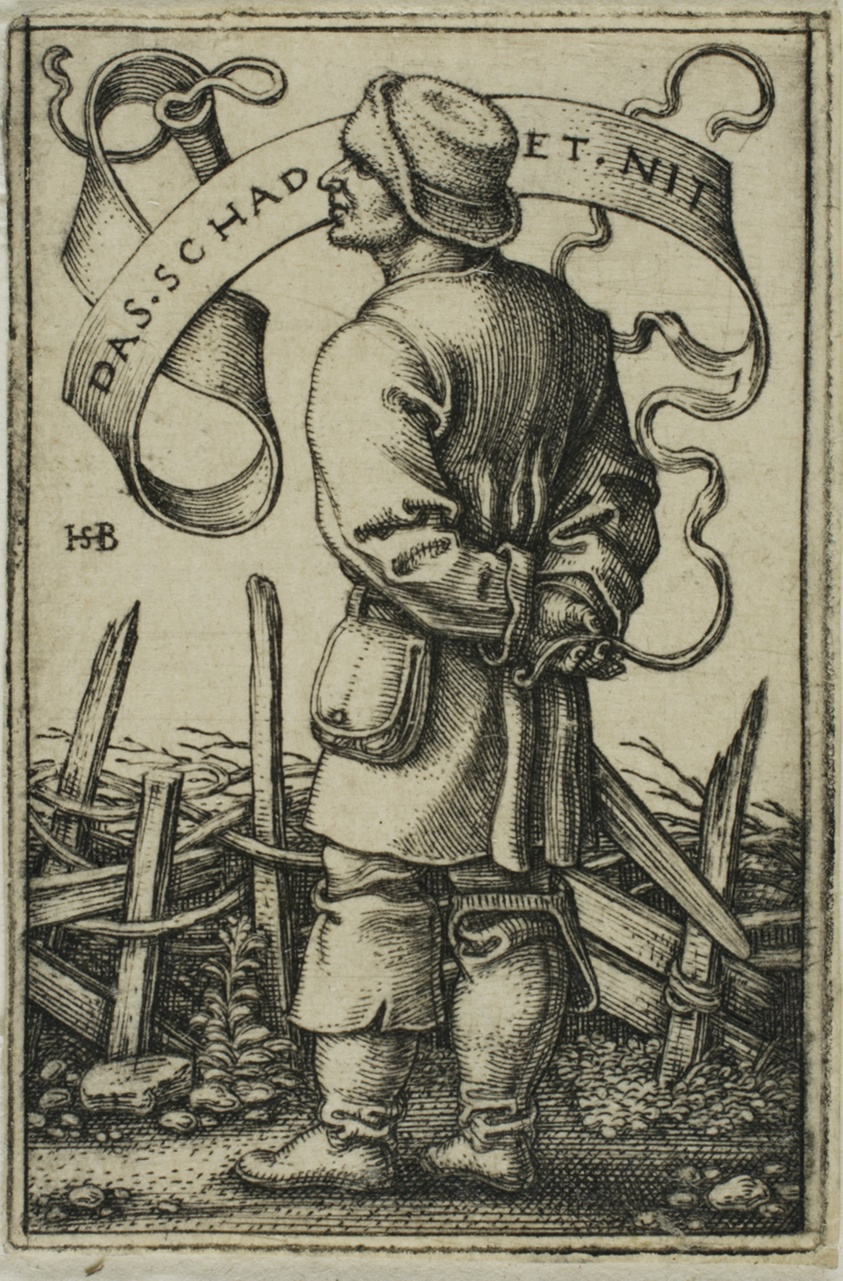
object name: Print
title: The Weather-Peasant "Das Schadet Nit"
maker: Sebald Beham; German, 1500-1550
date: c. 1542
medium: Engraving in black on ivory laid paper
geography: Germany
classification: engraving; print; prints and drawing